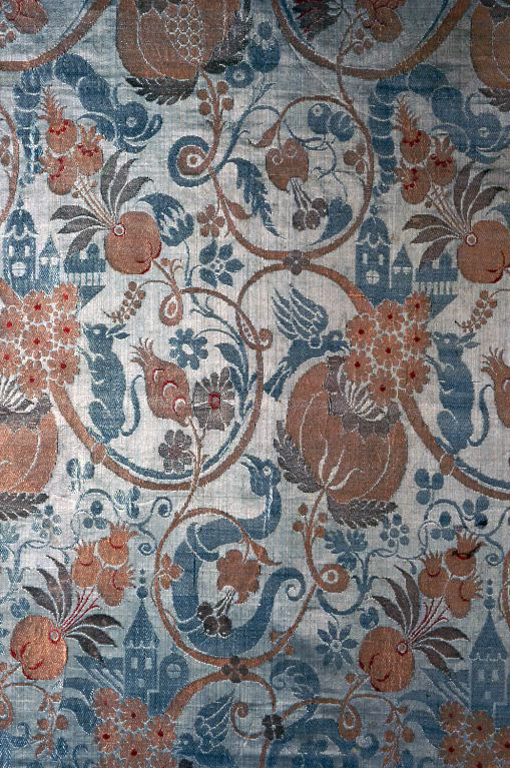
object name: Textile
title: Panel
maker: France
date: c. 1707/08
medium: Silk, gilt-and-silvered-metal-strip-wrapped silk, warp-float faced 4:1 satin weave with supplementary brocading wefts bound in twill interlacings and self-patterned by areas of weft-float faced 4:1 twill interlacing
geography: France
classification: textile; weaving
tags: flowers